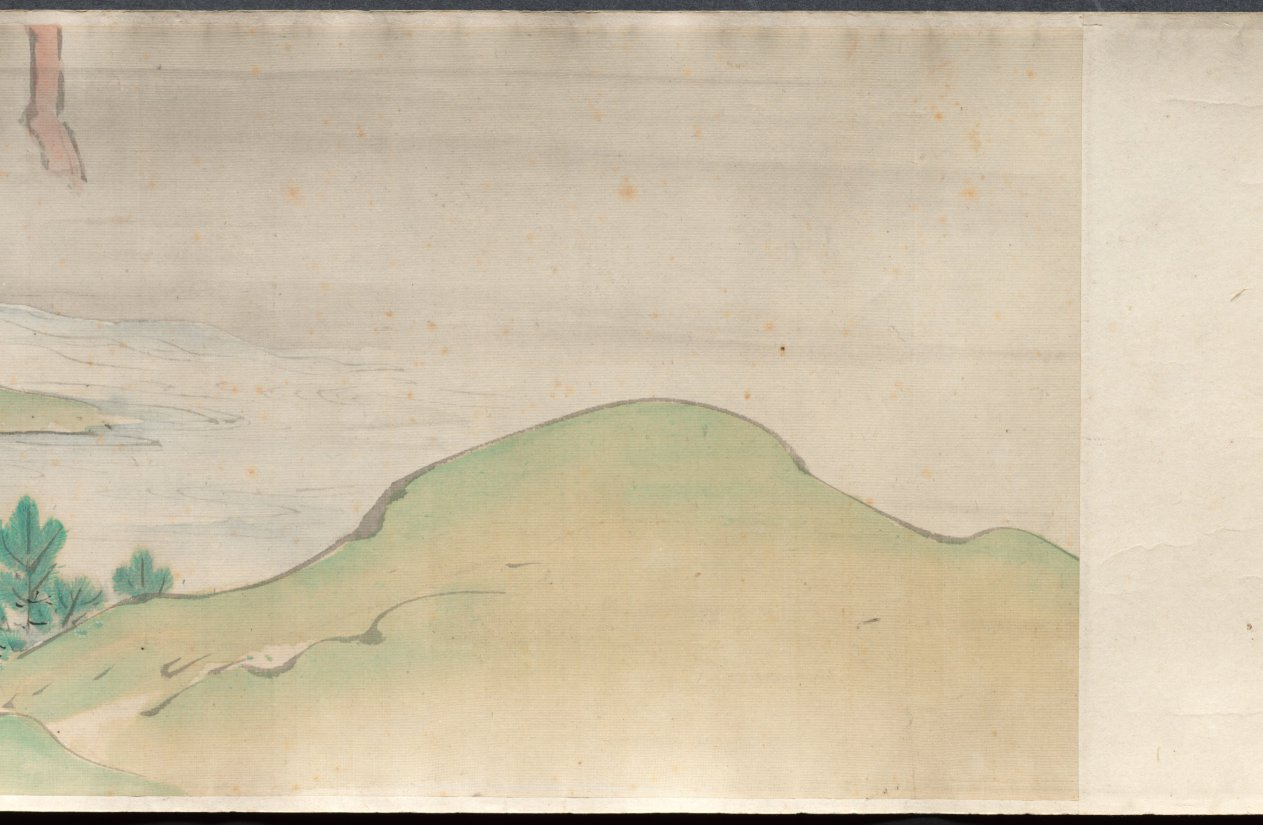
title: The Shadow Dancers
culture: Japan, Edo period (1615–1868)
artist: Yamamoto Baiitsu (Japanese, 1783–1856)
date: 1800s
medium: handscroll, ink and color on silk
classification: Painting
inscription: artist's signature and two seals at end of painting.